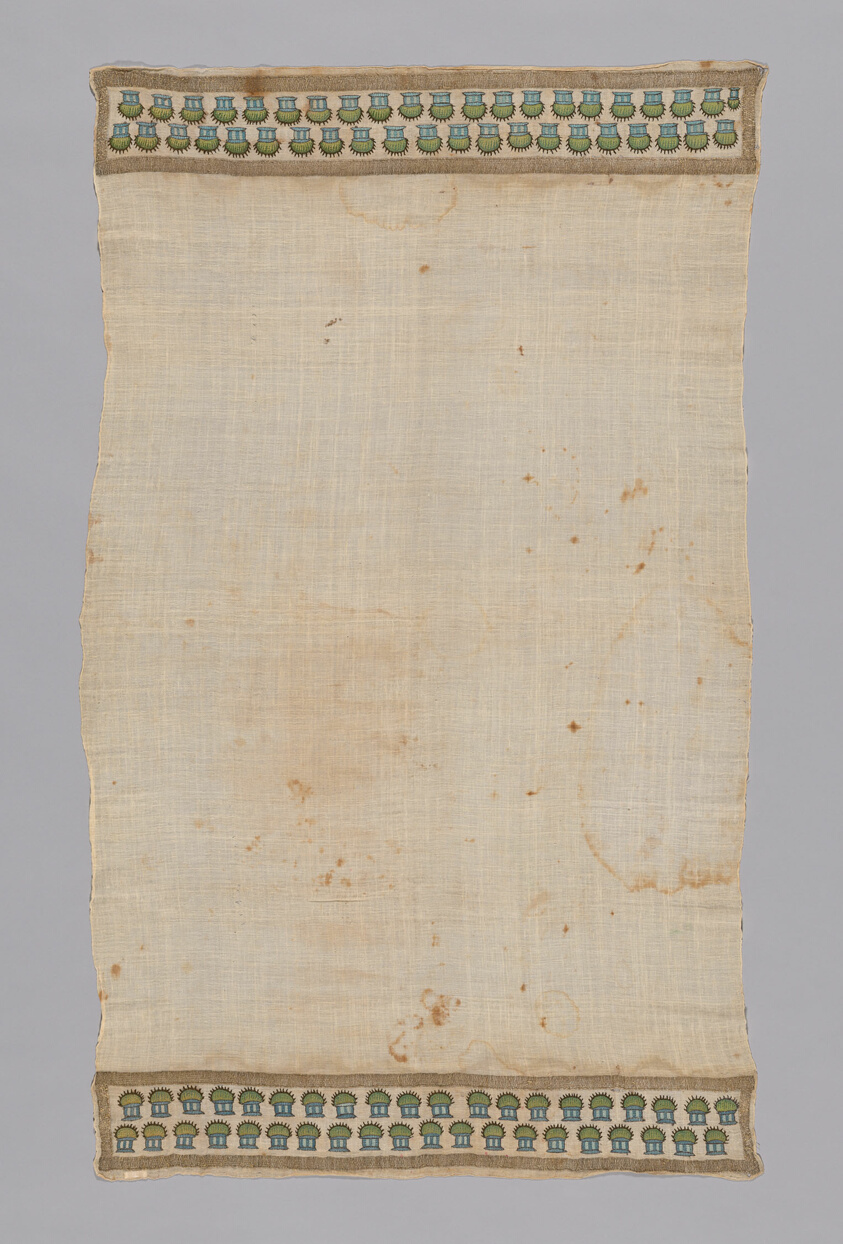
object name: Textile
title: Towel or Napkin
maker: Turkey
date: 18th century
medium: embroidered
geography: Turkey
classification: textile; needlework (visual works); weaving